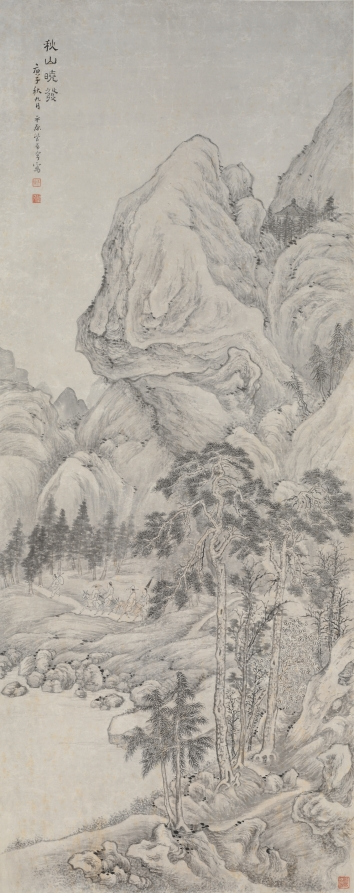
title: Landscape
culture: China, Qing dynasty (1644-1911)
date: 1644–1911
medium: hanging scroll, ink and slight color on paper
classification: Painting